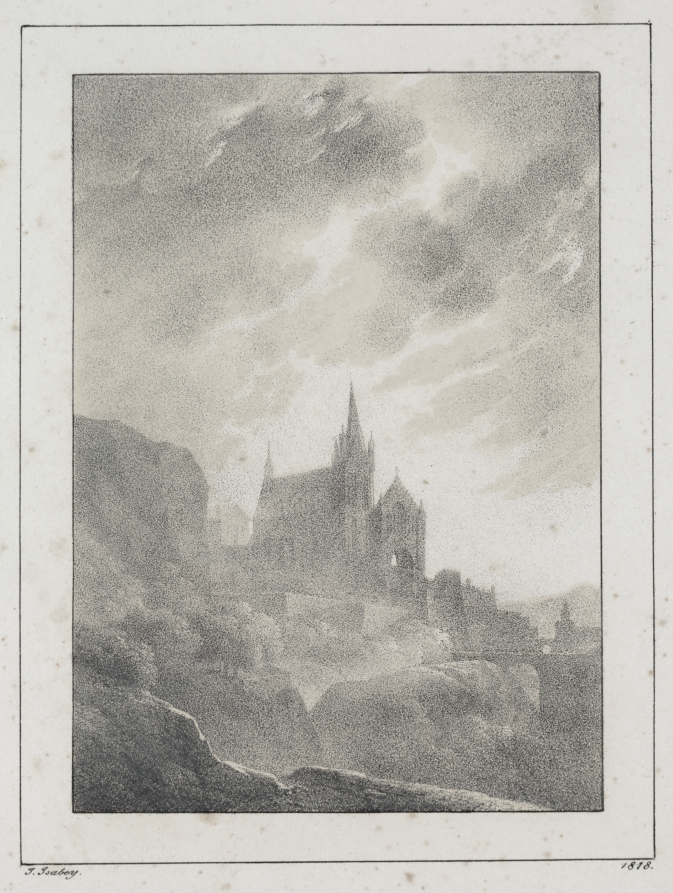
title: The Cathedral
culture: France, 19th century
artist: Jean-Baptiste Isabey (French, 1767–1855)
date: 1818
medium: lithograph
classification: Print